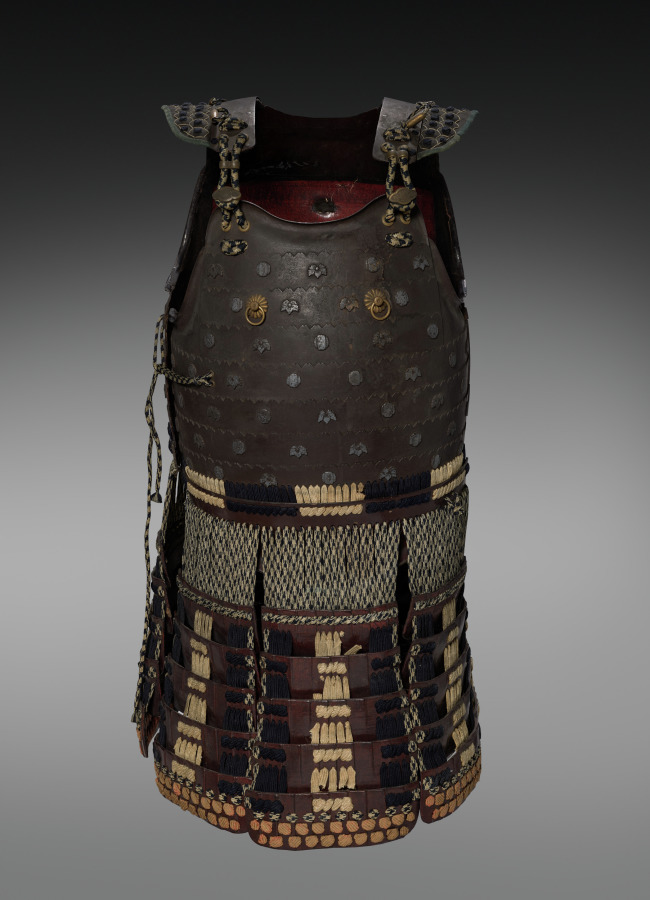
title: Chest Armor (Cuirass; Dō) and Fauld (Kusazuri)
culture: Japan, Edo period (1615–1868)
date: 1600s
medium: Iron, lacquer, textile (silk)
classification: Arms and Armor